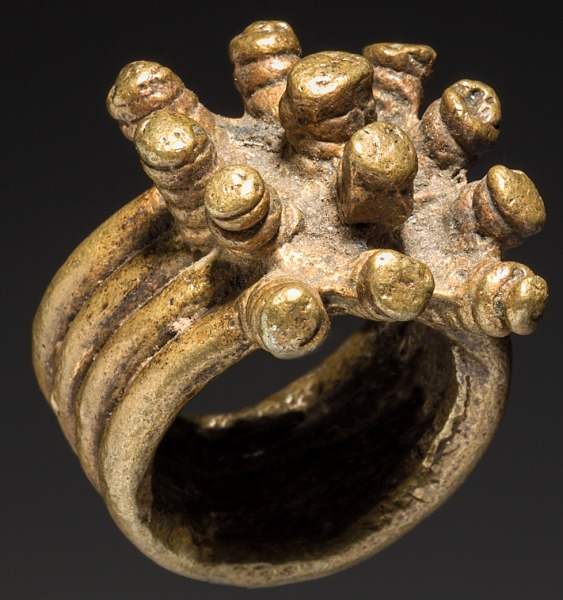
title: Ring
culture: Africa, West Africa, Côte d'Ivoire, Senufo-style maker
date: by 1969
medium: Copper alloy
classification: Jewelry